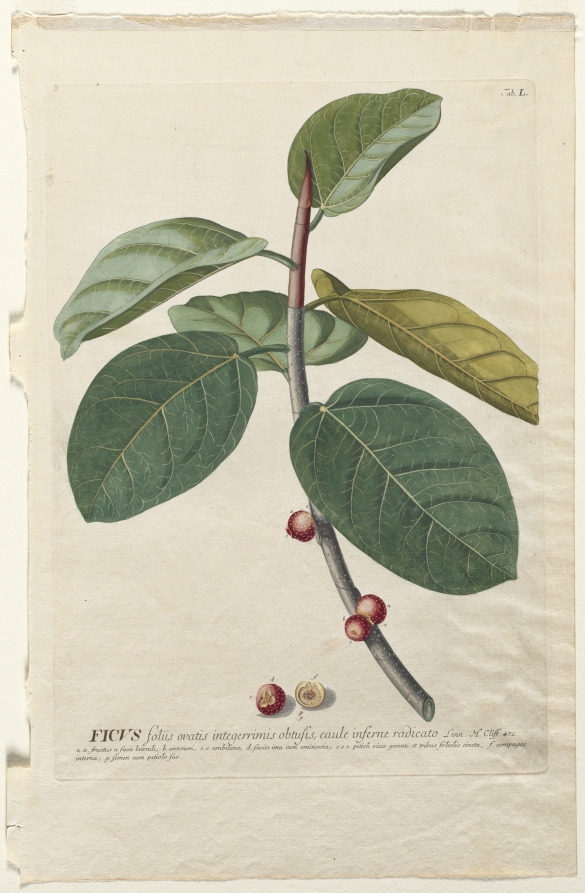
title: Plantae Selectae: No. 50 - Ficus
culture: Germany, 18th century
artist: Georg Dionysius Ehret (German, 1708–1770)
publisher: Christopher Jacob Trew (German, 1695–1769)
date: published 1750–73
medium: engraving, hand-colored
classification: Print